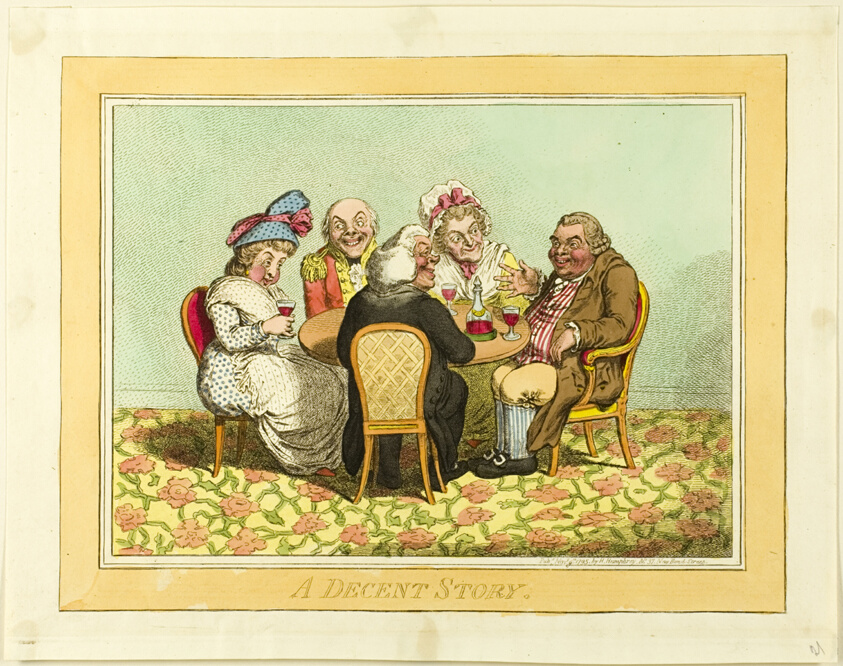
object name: Print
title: A Decent Story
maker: James Gillray (English, 1756-1815); published by Hannah Humphrey (English, c. 1745-1818)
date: published November 9, 1795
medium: Etching in dark brown, with handcoloring, on cream wove paper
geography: England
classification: etching; print; prints and drawing